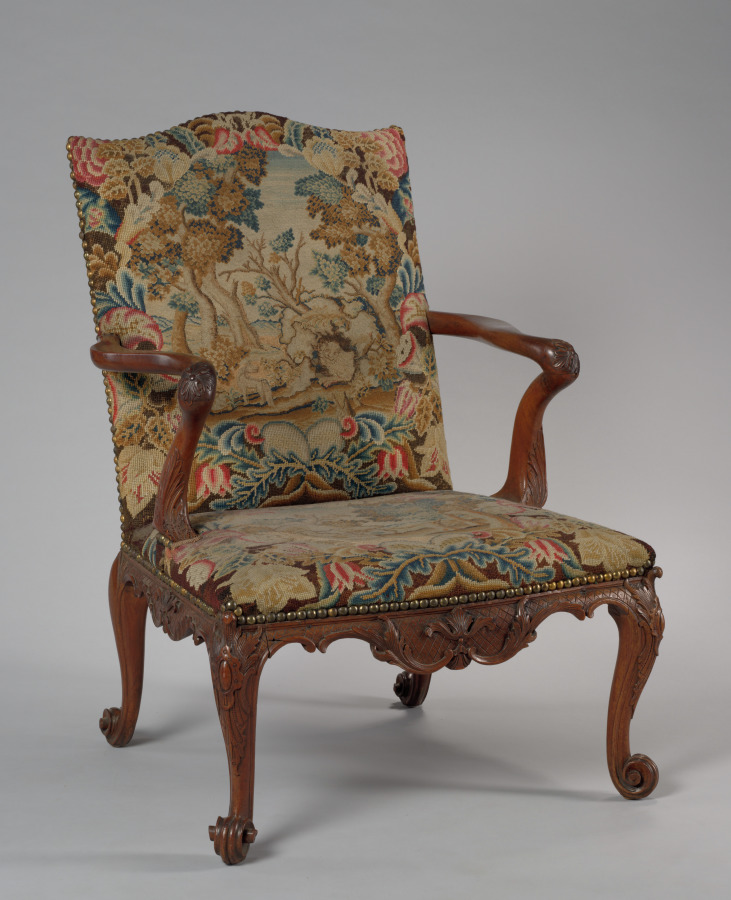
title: Armchair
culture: England, 18th century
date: 1760–1765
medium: mahogany upholstered in needlework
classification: Furniture and woodwork